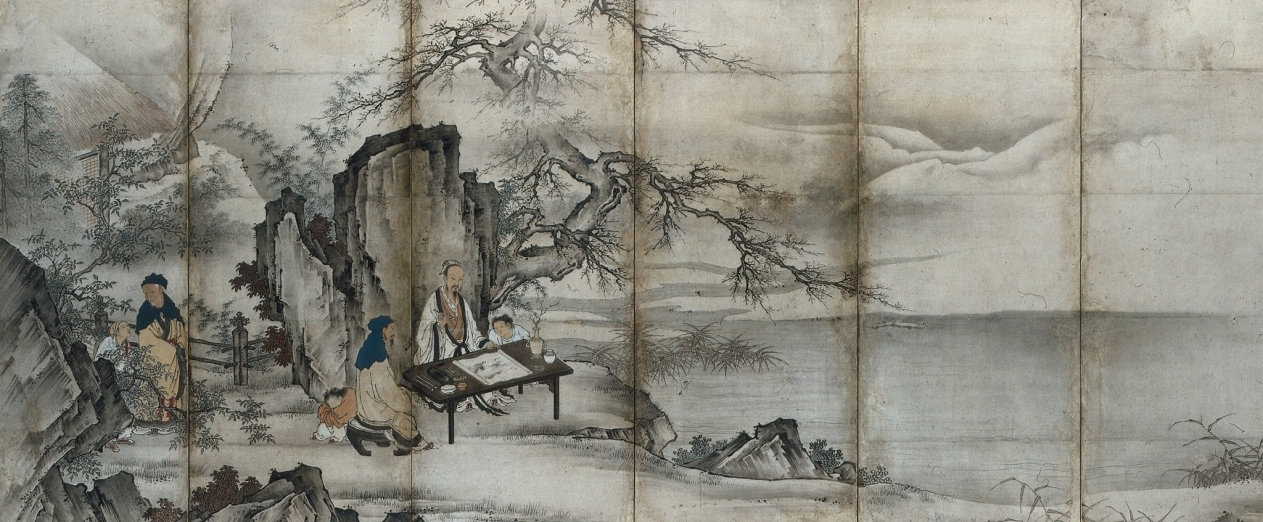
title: The Four Accomplishments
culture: Japan, Momoyama period (1573–1615)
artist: attributed to Kano Shōei (Japanese, 1519–1592)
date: late 1500s–early 1600s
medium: One of a pair of six-panel folding screens; ink and slight color on paper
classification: Painting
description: This is one of a pair of screens showing a group of elite Chinese gentlemen and their servants in the countryside. One man is considering his painting-in-progress. Historically, practicing or admiring painting was considered a skill essential for cultured men in China.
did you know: Although the painter captures his companion's attention, his young servant is having a nap.